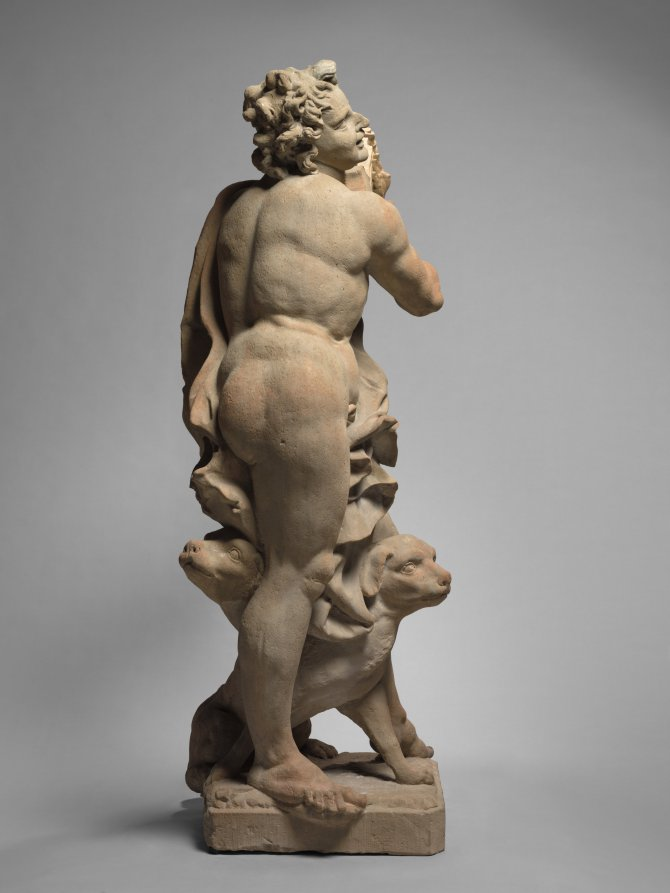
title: Orpheus and Cerberus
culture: Germany, near Bamberg, 18th century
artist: Ferdinand Tietz (Austrian, 1708–1777)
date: c. 1765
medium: sandstone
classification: Sculpture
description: This work was one of numerous sculptures Tietz created for the gardens of Schloss Seehof, near Bamberg in Bavaria (Germany), the summer residence of the Prince Bishops of Bamberg. The exaggerated forms of Orpheus's face and musculature caricature the idealized proportions of classical sculpture. A further parody exists with his companion: the usually terrifying hound Cerberus is here nothing more than a docile puppy, sitting calmly at Orpheus's feet. Meant to be viewed outdoors, on a high pedestal and from a distance, this work is less finely detailed than sculptures Tietz made for indoor settings at Seehof.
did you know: Taught to play the lyre by the Greek god Apollo, Orpheus's legendary musical abilities had the power to charm animals.